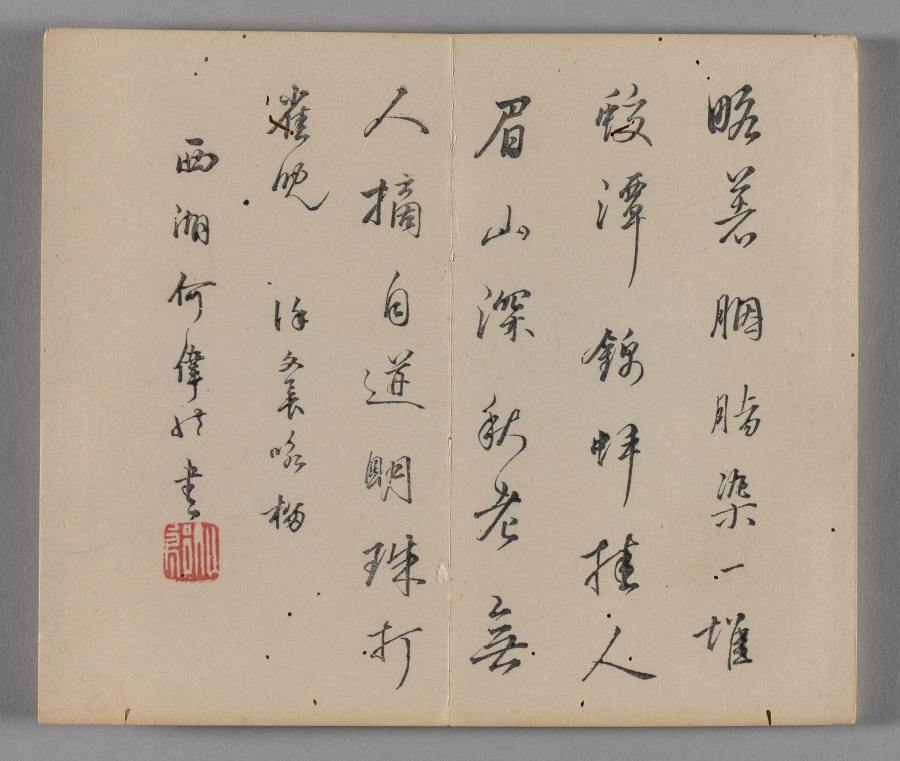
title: Ten Bamboo Studio Collection of Calligraphy and Painting: Miscellaneous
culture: China, Qing dynasty (1644-1911)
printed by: Hu Zhengyan (Chinese, c. 1584–1674)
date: 1633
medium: Woodblock-printed book; ink and colors on paper; first edition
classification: Print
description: Color printing reached a level of perfection in the early 1600s, as seen in this Ten Bamboo Studio Collection of Calligraphy and Painting and the Mustard Seed Garden Manual of Painting (printed 1679 and 1701). The painterly quality, precision in registering (aligning) the woodblocks, and harmonious colors made them the most successful color print editions in Chinese history. Both editions were printed and compiled in Nanjing, spread nationwide, and had a great impact on the arts in Japan and Korea.